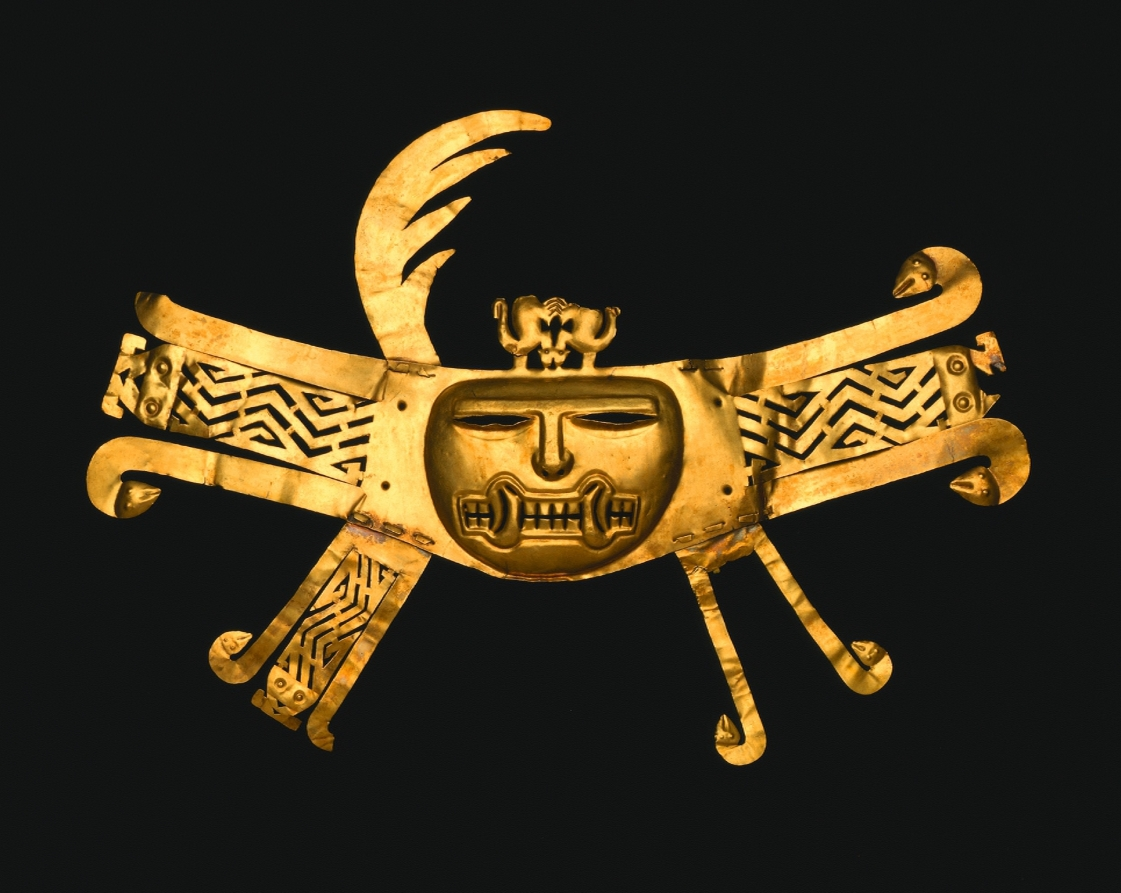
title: Mask Ornament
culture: Peru, Moche or Recuay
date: 1–550 CE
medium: cut and hammered gold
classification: Metalwork